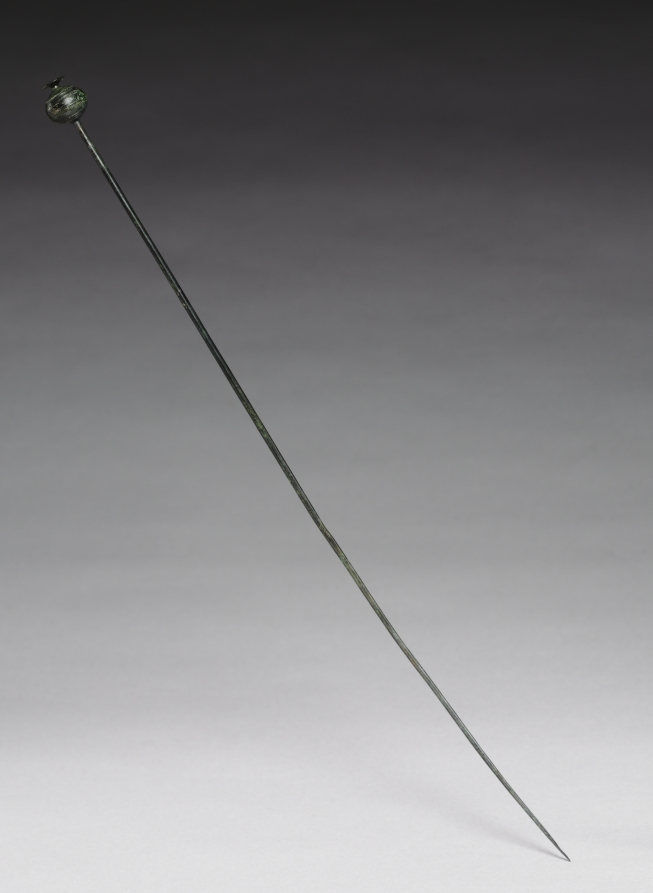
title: Garment Pin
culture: possibly Hungary, Bronze Age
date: c. 1400 BCE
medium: cast and wrought bronze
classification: Jewelry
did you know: This metal pin was used to fasten clothing.